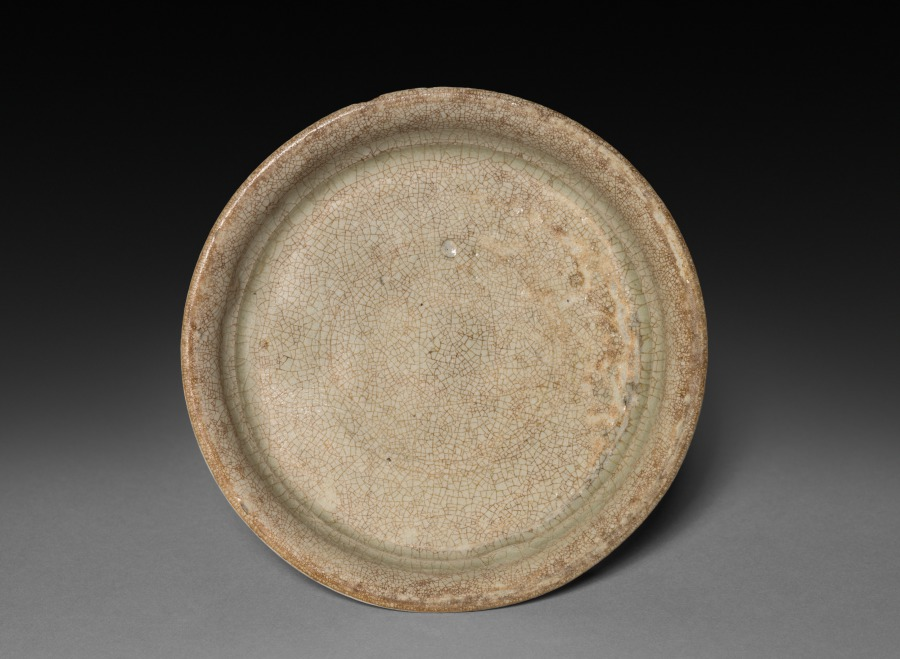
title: Stem Dish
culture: China, Tang dynasty (618-907)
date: 600s-700s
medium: glazed cream-white stoneware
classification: Ceramic